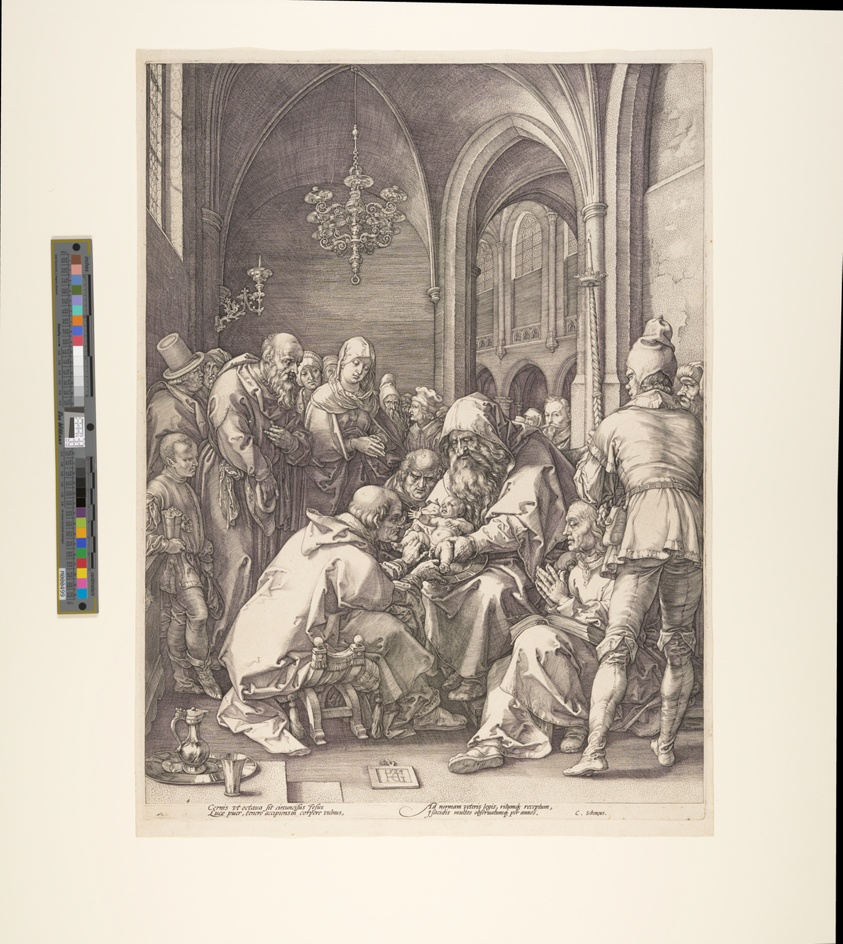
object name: Print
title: The Circumcision, from The Birth and Early Life of Christ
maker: Hendrick Goltzius (Dutch, 1558–1617)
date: 1594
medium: Engraving on ivory laid paper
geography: Netherlands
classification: engraving; paper; print; prints and drawing